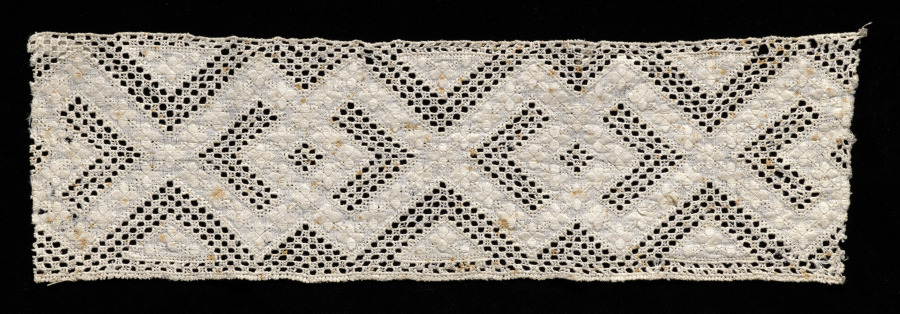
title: Lace fragment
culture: Italy, Venice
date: 1500s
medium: Linen: needle lace (cutwork) insertion and embroidery; satin stitch (punto reale)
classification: Lace